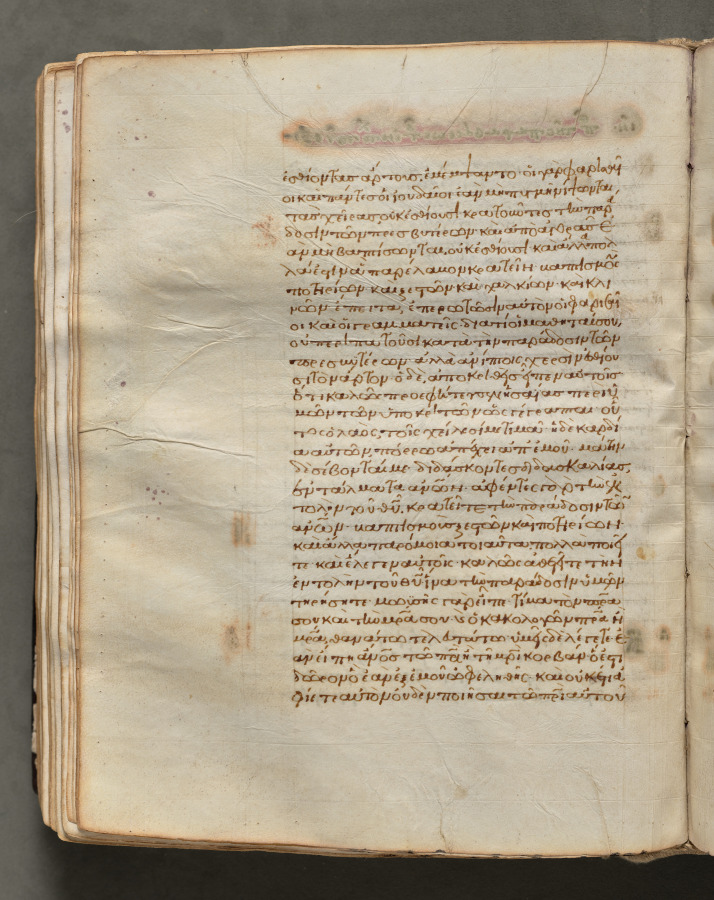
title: Text, folio 154 (verso), from a Gospel Book with Commentaries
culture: Byzantium, Constantinople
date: c. 1000–1100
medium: ink, tempera, and gold on vellum; leather binding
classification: Bound Volume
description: Each of the four gospels in this book opens on a page with brilliantly illuminated borders depicting the author of the text as well as birds-principally peacocks, symbols of the immortality of the soul-and fountains, representing the fountain of life and the salvation of the soul. This volume consists of 428 leaves with texts in Greek. Its level of sophistication suggests that it was probably written and decorated in a monastery in Constantinople.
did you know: Gospel Books were carried in procession through Byzantine churches.